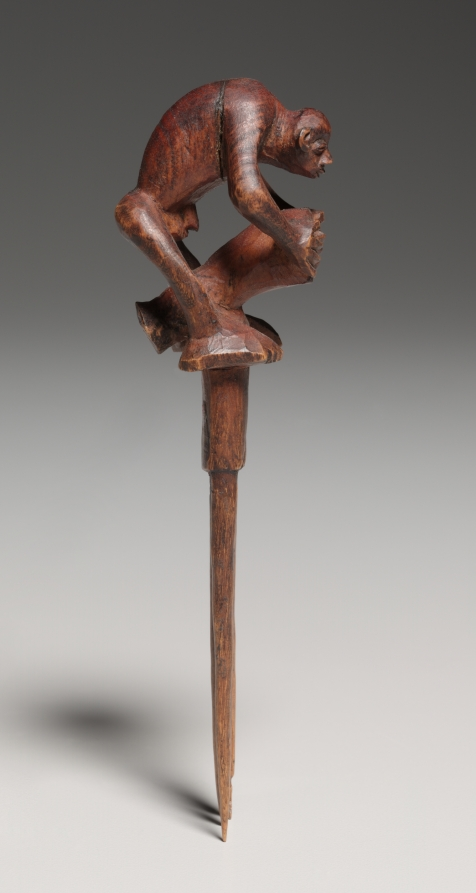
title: Comb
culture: Central Africa, Democratic Republic of the Congo or Angola, Chokwe, 20th century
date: c. 1910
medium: Wood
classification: Tool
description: Several combs demonstrate a diversity of form and treatment. One (1976.180), a vigorously carved work showing a powerful drummer in performance, is an excellent example of Chokwe artistry meant for female patrons.